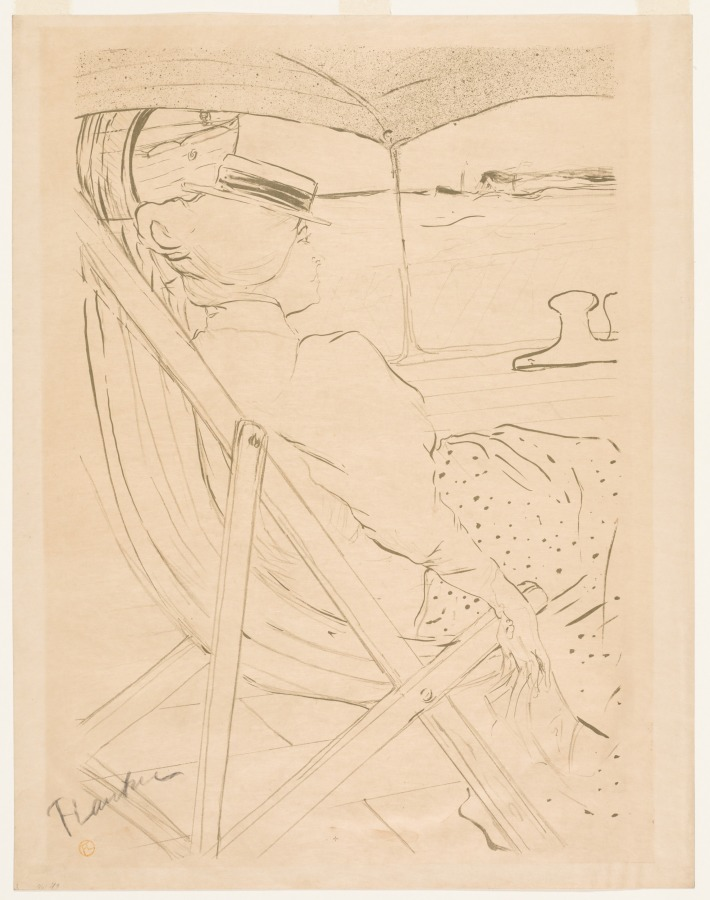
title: La Passagère du 54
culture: France, 19th century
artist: Henri de Toulouse-Lautrec (French, 1864–1901)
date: 1896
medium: lithograph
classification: Print